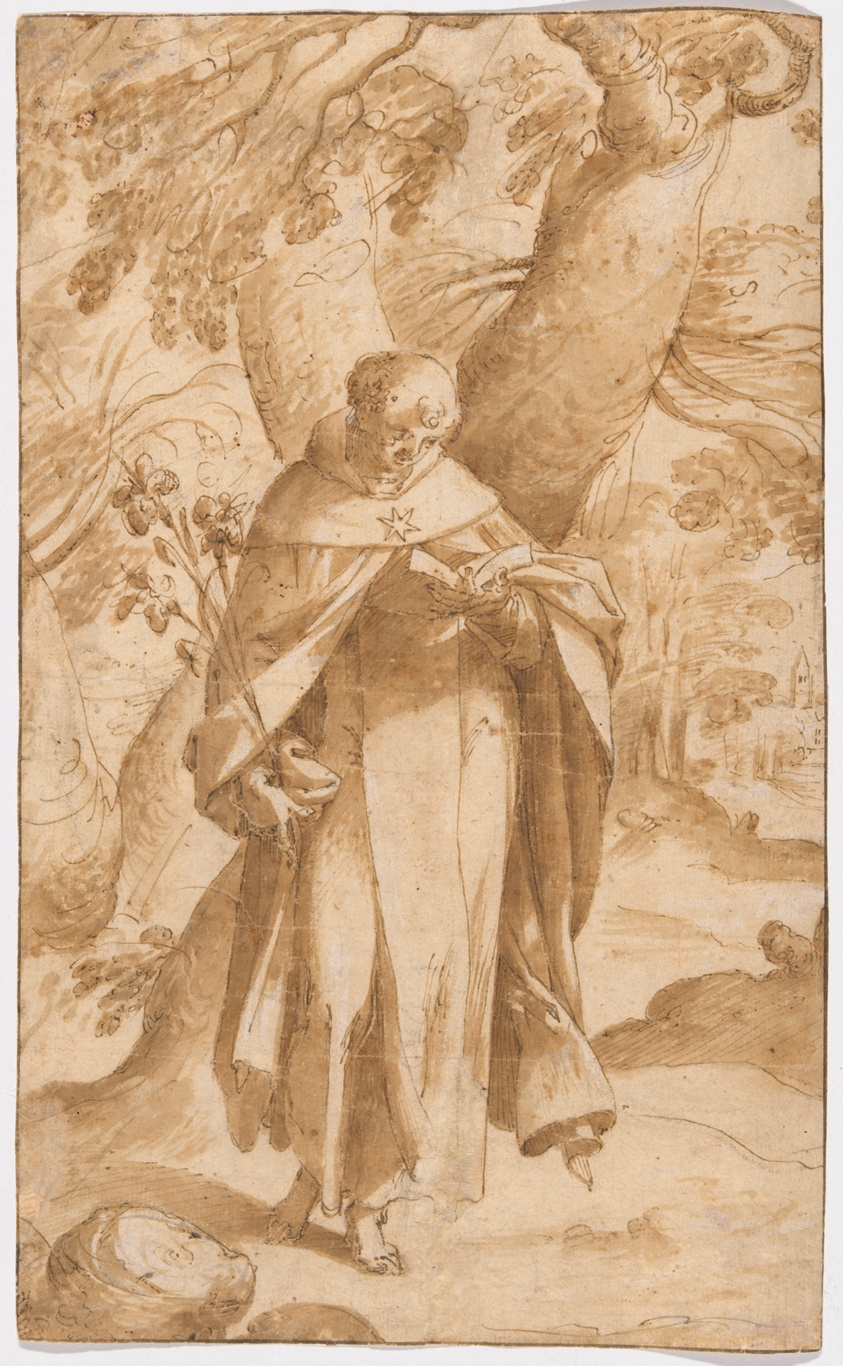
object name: Drawing and Watercolor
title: Saint Dominic Reading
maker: Bartholomaeus Spranger (Flemish, 1546-1611)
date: c. 1573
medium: Pen and brown ink and brush and brown wash, with touches of opaque white watercolor, over traces of black chalk, on cream laid paper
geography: Flanders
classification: ink; drawings (visual works); prints and drawing